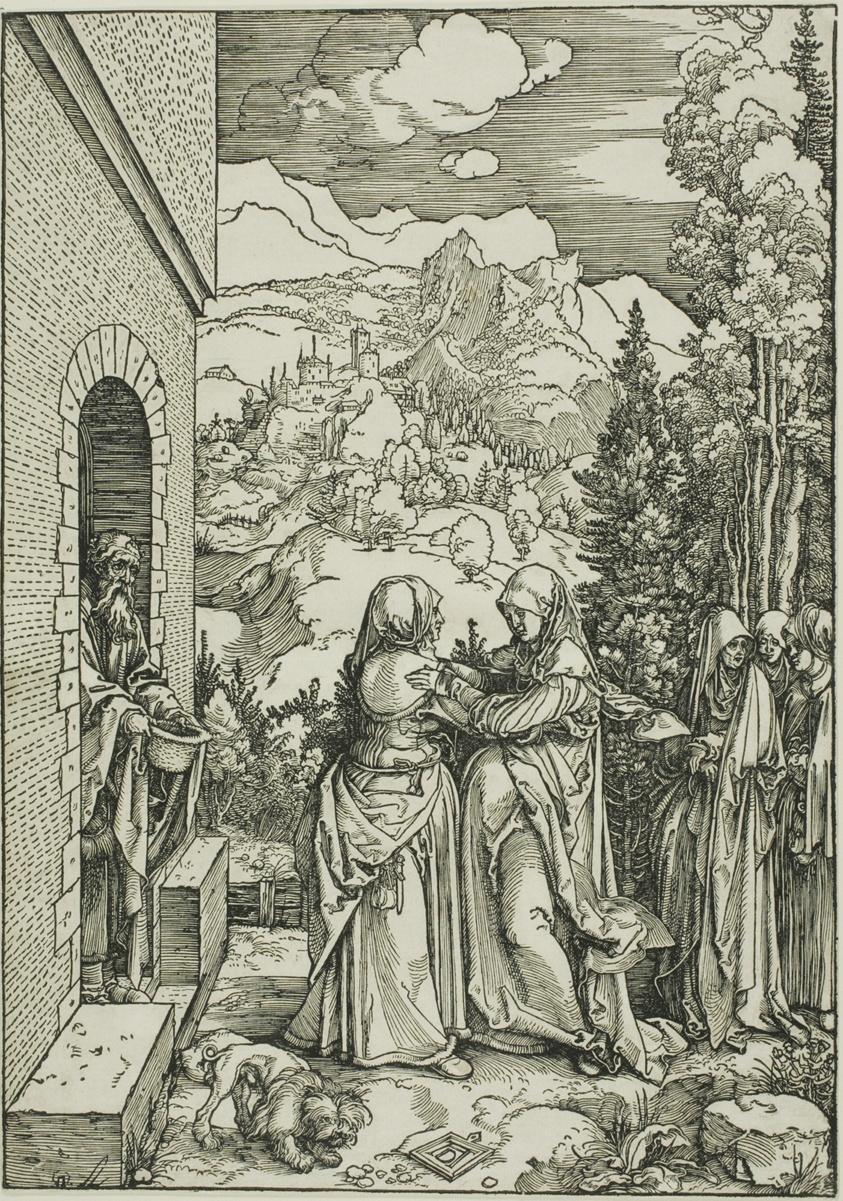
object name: Print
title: The Visitation, from The Life of the Virgin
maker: Albrecht Dürer (German, 1471-1528)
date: c. 1504, published 1511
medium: Woodcut in black on ivory laid paper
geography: Germany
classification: woodcut; print; prints and drawing; paper